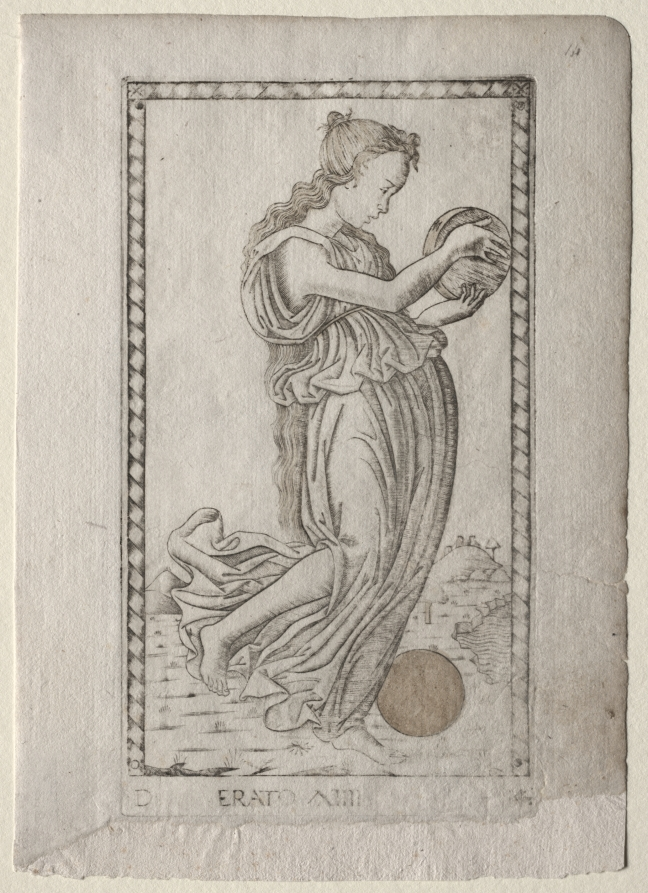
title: Erato (lyric and love poetry) (from the Tarocchi series D: Apollo and the Muses, #14)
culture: Italy, Ferrara, 15th century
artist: Master of the E-Series Tarocchi (Italian, active 1460s)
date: before 1467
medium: engraving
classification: Print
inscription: Lettered below the image of Earto (Lyric and Love Poetry): ·D·/ ·ERATO XIIII / [14]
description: This engraving is part of the Tarocchi group marked with the letter “D,” and named Apollo and the Muses. In Greek mythology, the nine Muses (Calliope, Urania, Terpsichore, Erato, Polyhymnia, Thalia, Melpomene, Euterpe, and Clio) were the daughters of Zeus, king of the gods, and Mnemosyne, the Titaness of memory. The Muses were goddesses presiding over different branches of the arts and sciences. Their leader and supervisor was Apollo, the god of light, music, prophecy, and poetry. Here, Erato is personified as a full-length female figure, in profile to the right, and set in an imaginary landscape. Her dancelike pose and the tambourine she carries suggest that she is the Muse of the dance. Erato was also regarded as the Muse of lyric and love poetry.